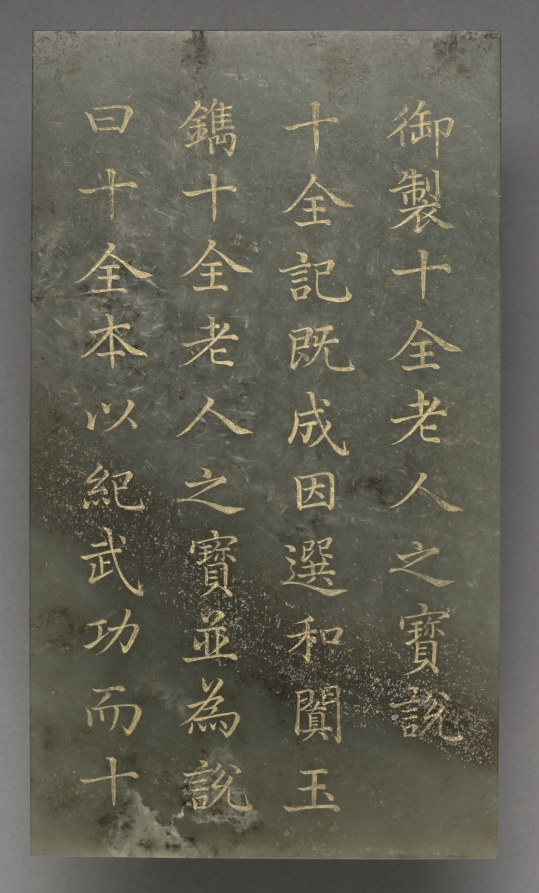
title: Tablet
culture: China, Qing dynasty (1644–1911), Qianlong reign (1736–95)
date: 1778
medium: jade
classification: Jade